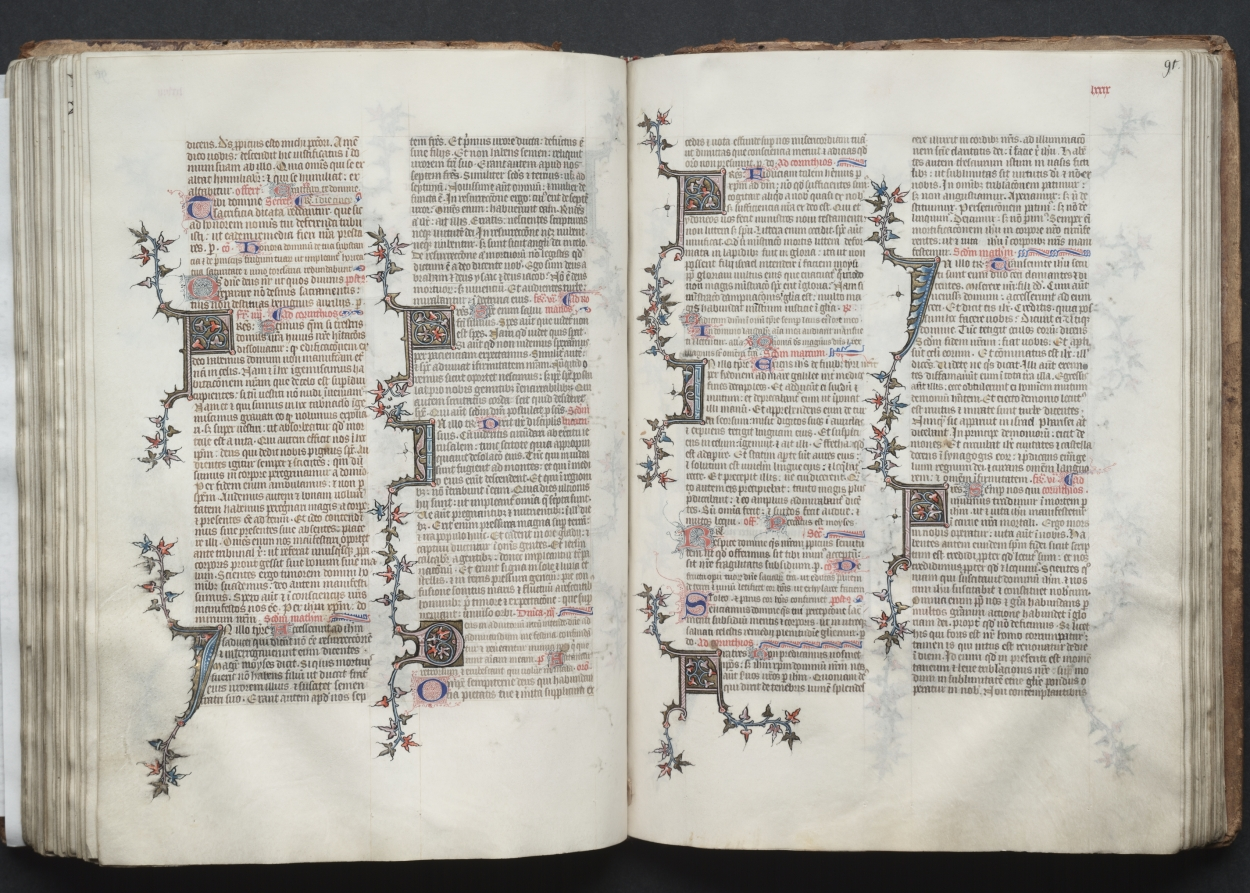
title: The Gotha Missal: Fol. 91r, Text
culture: France, Paris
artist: Master of the Boqueteaux (French)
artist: and Workshop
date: c. 1375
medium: ink, tempera, and gold on vellum; blind-tooled leather binding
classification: Bound Volume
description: The style and quality of this manuscript's decoration is typical of deluxe Parisian books made for aristocratic or royal patrons. Most of the book's decoration appears to be the work of the Master of the Boqueteaux, an artist active at the court of King Charles V (died 1380). His style was apparently shared by a number of book illuminators working in and around Paris. It is very possible that the Gotha Missal belonged to Charles V, but is not provable because the manuscript has no royal portraits and lacks a colophon. Given the book's magnificent decoration, however, it would seem that it was produced for a Valois prince, if not for the king himself. The manuscript receives its name from the German dukes of Gotha, its later owners.